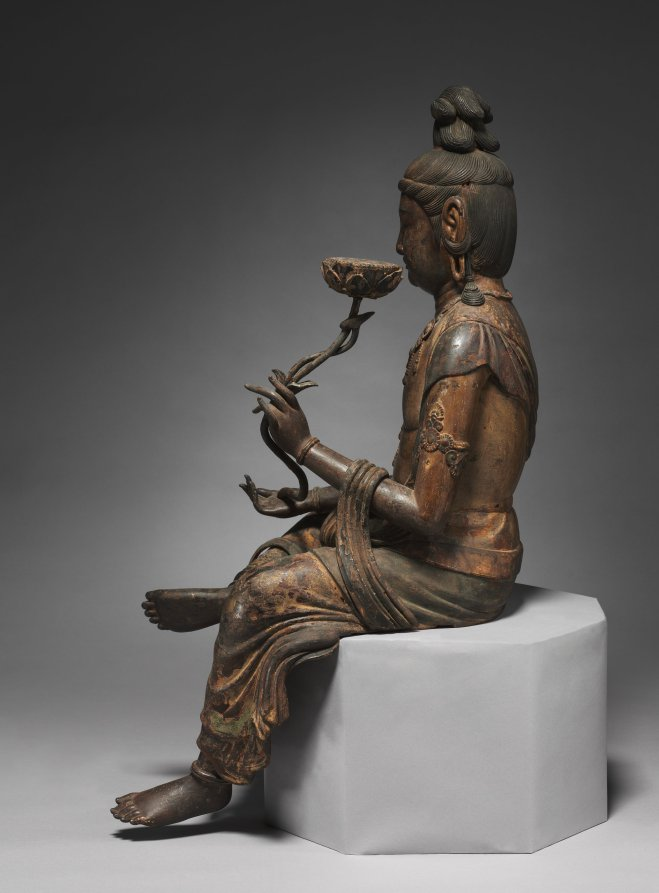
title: Bodhisattva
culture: Japan, Kamakura period (1185–1333)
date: mid-1200s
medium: wood with traces of lacquer, polychromy, and cut gold lear (kirikane)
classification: Sculpture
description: A Bosatsu (Bodhisattva in Sanskrit) is a being that has attained enlightenment but has compassionately refrained from entering nirvana in order to save others. As an attendant of Buddha, Bosatsu assumes many forms, all of which are worshipped as deities in Japanese Buddhism.